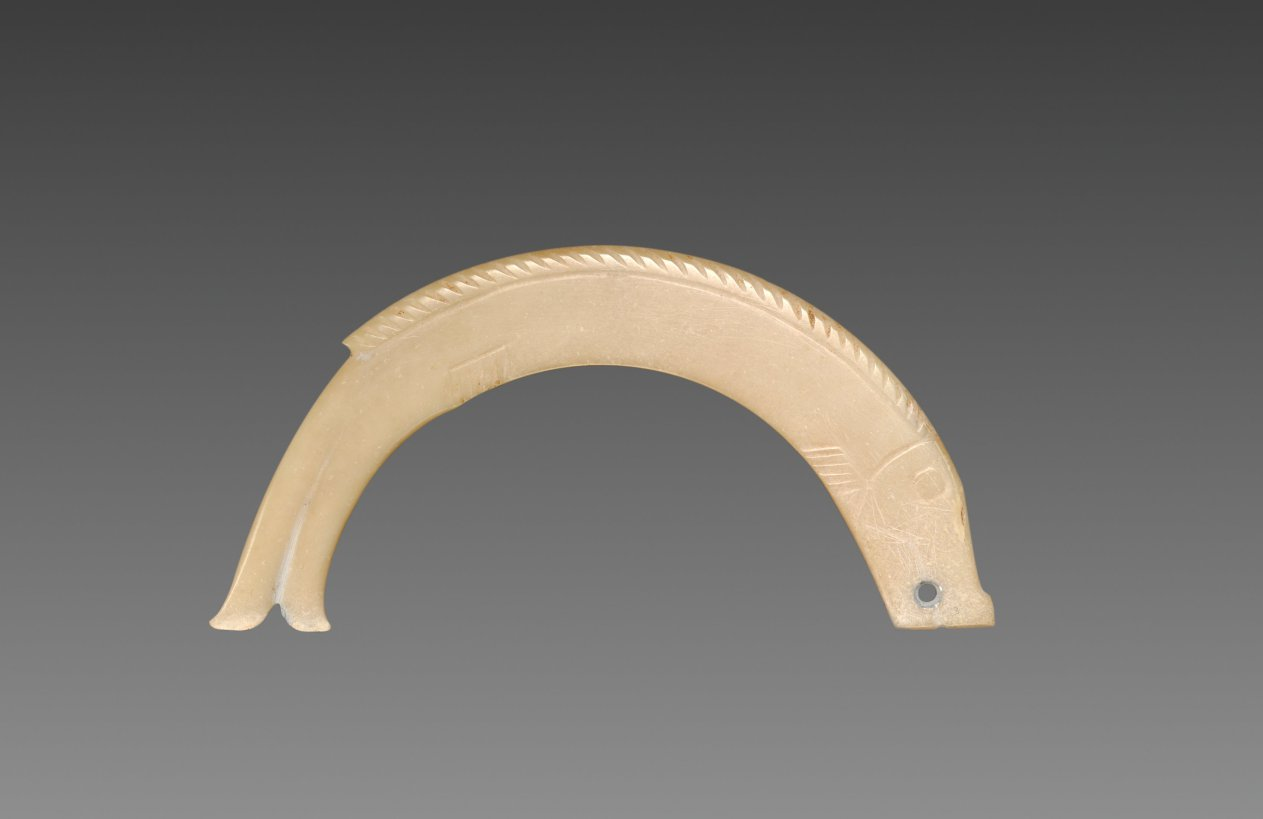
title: Arc-Shaped Jade Fish Pendant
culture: China, Western Zhou dynasty (c. 1046–771 BCE)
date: c. 1050–900 BCE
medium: nephrite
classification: Jade